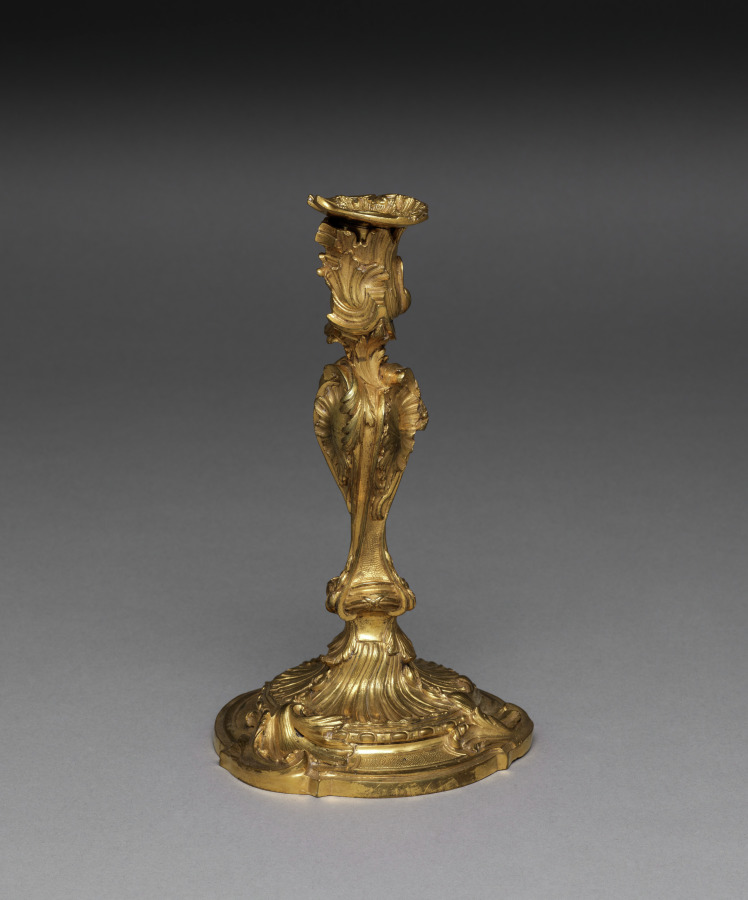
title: Candlestick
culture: France, 18th century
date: 1745–1749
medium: gilt metal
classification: Furniture and woodwork